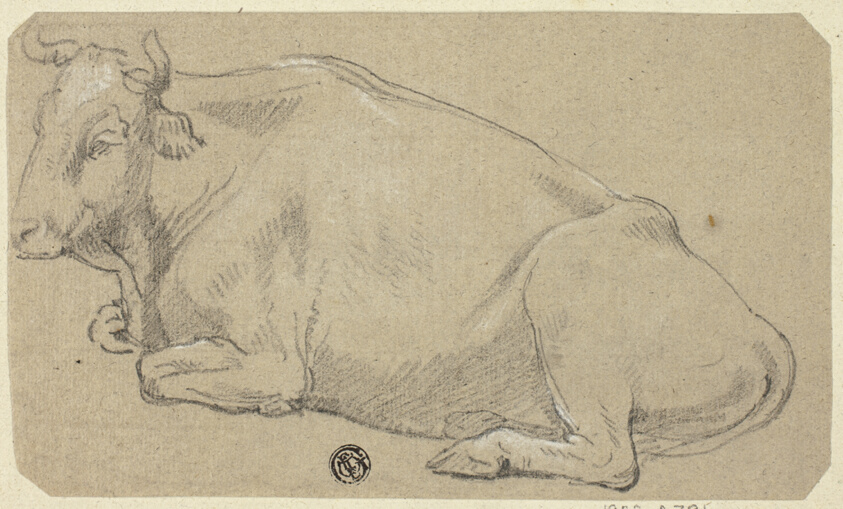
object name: Drawing and Watercolor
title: Cow Lying on Haunches (recto); Head of a Woman and Sketch of Horse's Head (verso)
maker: Unknown Artist; English, 19th century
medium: Black chalk, heightened with white chalk (recto and verso), on tan laid paper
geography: United Kingdom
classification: chalk; paper; drawings (visual works); prints and drawing